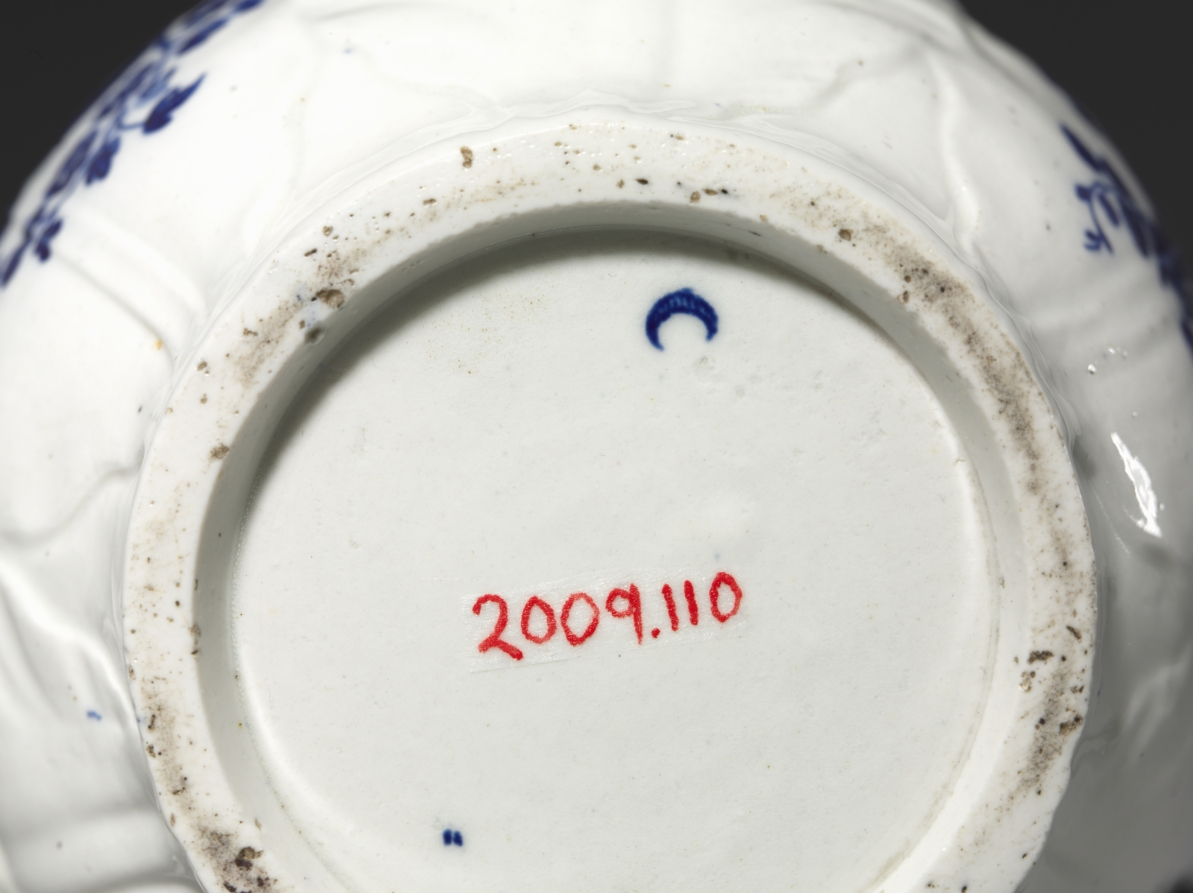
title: Pitcher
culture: England, 18th century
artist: Worcester Porcelain Factory (British, established 1751)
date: c. 1750–70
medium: porcelain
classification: Ceramic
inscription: Half moon mark on the bottom.